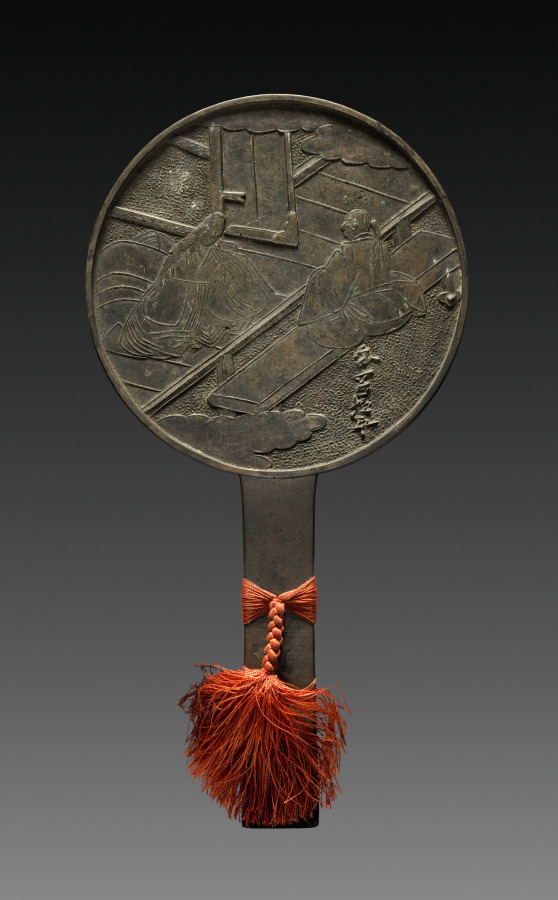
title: Mirror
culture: Japan, Edo period (1615–1868)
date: 1615–1868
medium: bronze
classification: Metalwork